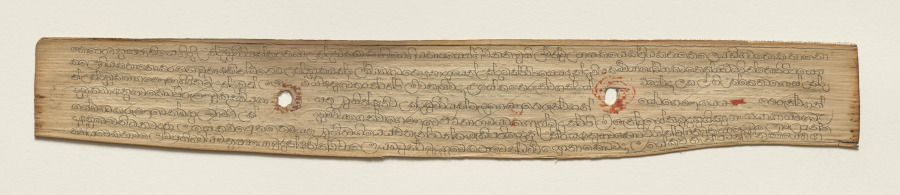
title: Leaf from a Buddhist Manuscript (verso)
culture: Sri Lanka, Singhalese, Late 17th century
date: c. 1700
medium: fiber paper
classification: Manuscript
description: Palm leaf material is still used for manuscripts in Sri Lanka. The palm leaves are prepared first by boiling them, drying them in the sun, and then rubbing them with oils. Scribes then use a metal stylus to incise the text. Then charcoal powder is wiped across the pages, filling in only the inscribed lines.